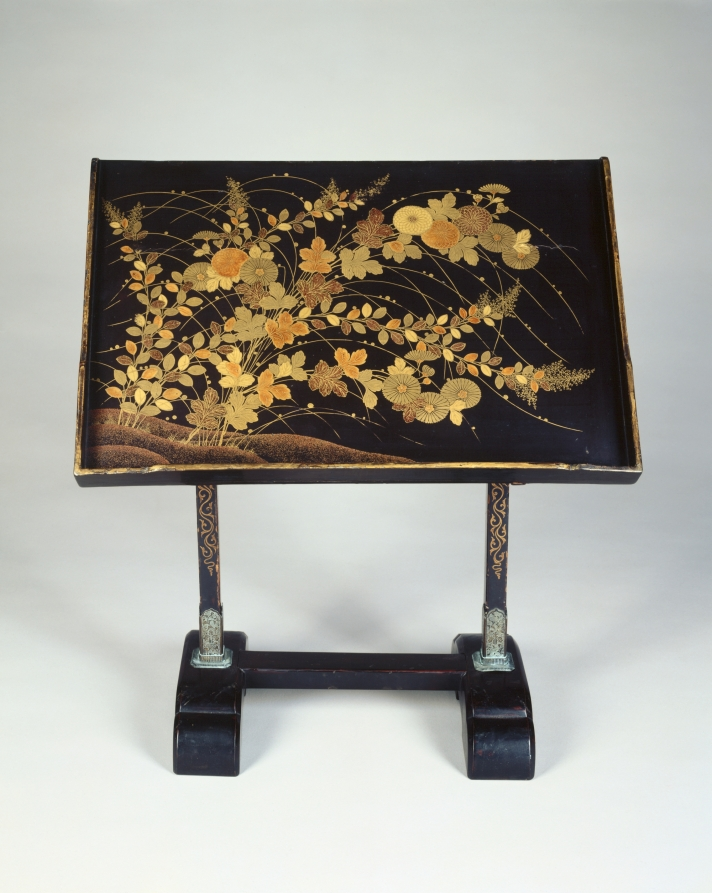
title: Reading Stand with Chrysanthemums and Autumn Grasses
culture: Japan, Momoyama period (1573–1615)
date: early 1600s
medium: Wood with lacquer, sprinkled gold powder (maki-e), and metal fittings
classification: Lacquer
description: Japanese reading stands often incorporate motifs associated with seasonal poetry. The combination of long, narrow, miscanthus grass, bush clover with its small, ovoid leaves, and chrysanthemum with its many-petaled blossoms is classic autumnal imagery. One lacquer technique featured prominently on the stand is sprinkled gold in low relief (hiramaki-e). Pear-skin ground design (nashiji-e) is used for the slopes of the ground and in some of the leaves.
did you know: Dew on chrysanthemum is seasonal imagery symbolizing the approach of winter.